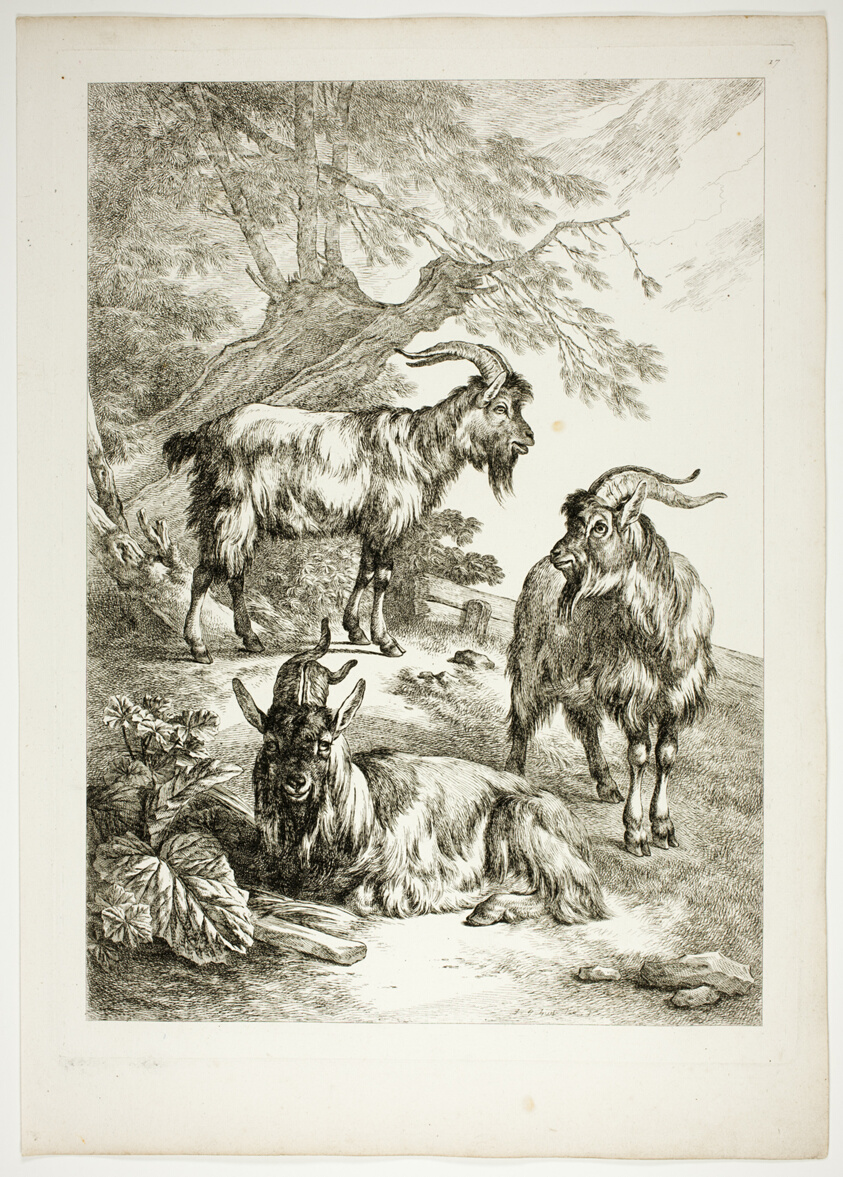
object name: Print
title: Plate Seventeen of 38 from Oeuvres de J. B. Huet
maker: Jean Baptiste Huet (French, 1745-1811)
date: 1796–99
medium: Etching on paper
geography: France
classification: etching; print; prints and drawing